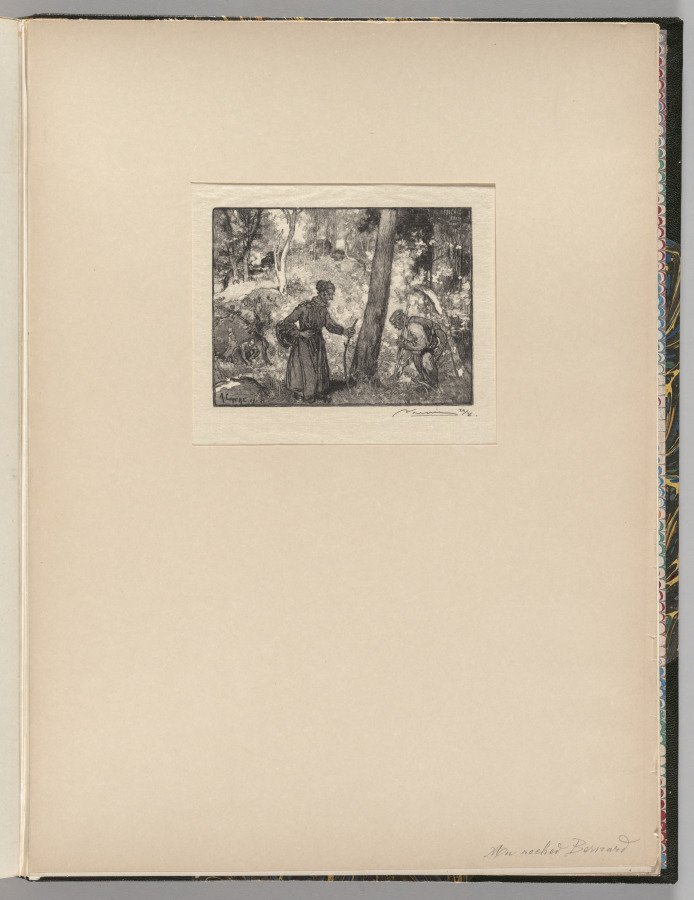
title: Fontainebleau Forest: Mushroom Hunters at the Rocher Bernard (La Forêt de Fontainebleau: Au rocher Bernard, chercheurs de champignons)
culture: France, 19th century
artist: Auguste Louis Lepère (French, 1849–1918)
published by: A. Desmoulins, Published in Revue Illustrée, 1887–90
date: 1890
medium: wood engraving from bound volume of 34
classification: Bound Volume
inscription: On block, lower right: A LEPERE Del s.c.; below image, lower right, in black ink: ALepère 22/35; on window mat, lower right, in graphite: Au rocher Bernard